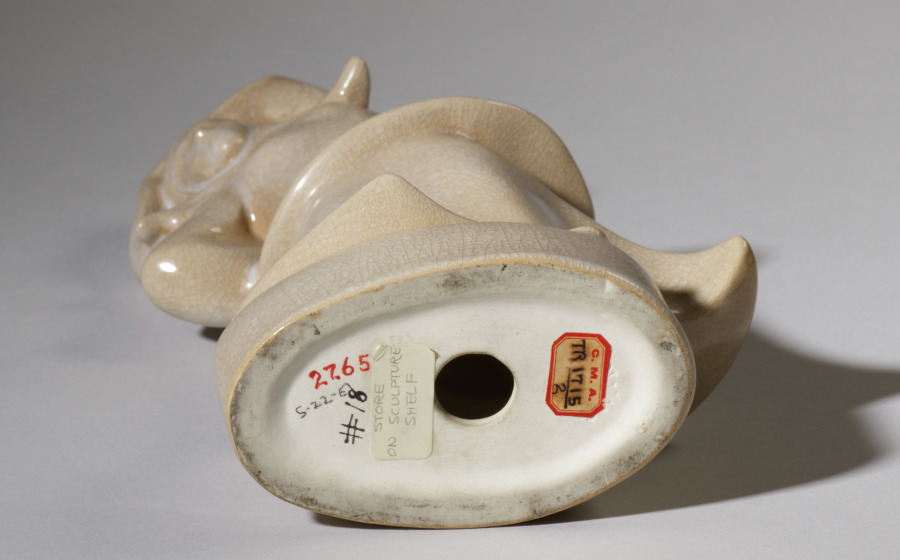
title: Dancer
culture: America, Ohio, Cleveland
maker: Cowan Pottery Studio (America, Rocky River, Ohio, 1920–1931)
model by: Alexander Blazys (American, born Russian Empire [now Lithuania], 1894–1963)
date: 1927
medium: mold-made ceramic, glazed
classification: Ceramic